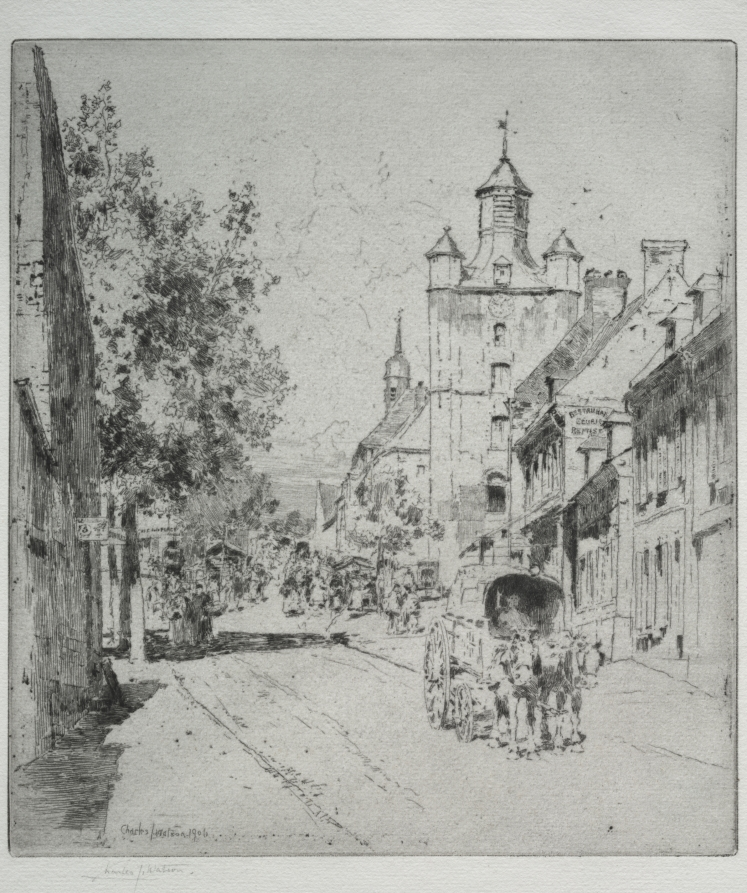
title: Tour de Marche, St. Riquier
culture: England, 20th century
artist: Charles John Watson (British, 1846–1927)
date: 1906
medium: etching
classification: Print